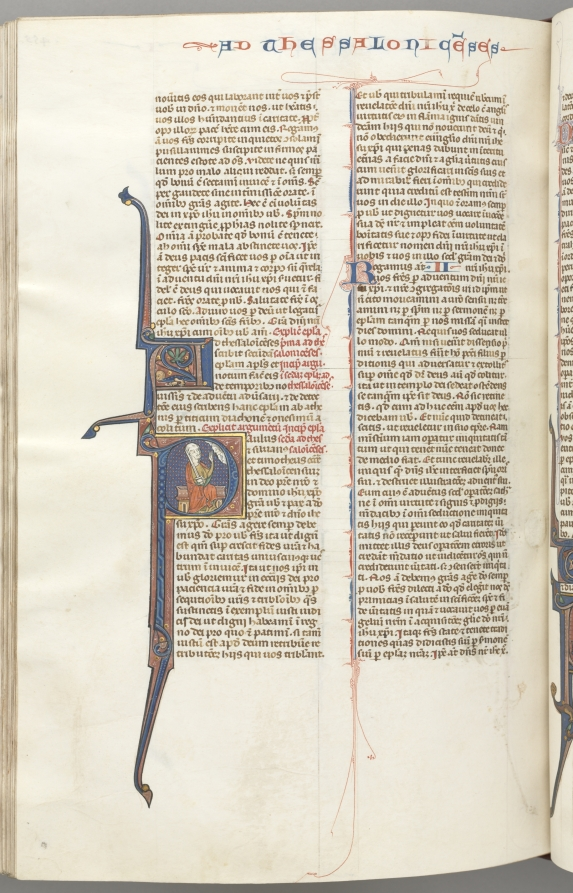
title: Fol. 455v, Thessalonians II, historiated initial P, Paul seated with a sword, talking to the bust of God above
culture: Southern France, Toulouse(?), 13th century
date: c. 1275–1300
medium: ink, tempera and gold on vellum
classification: Bound Volume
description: Biblical manuscripts were highly prized and important possessions of churches, monasteries, cathedral schools, and universities throughout medieval Europe. The biblical texts were known as the vulgate, the translations made by Saint Jerome in the fourth century from Hebrew and Greek into Latin, which became the definitive and official Latin version of the Roman Church. In the 13th century, the bible was, for the first time, produced as a single volume with an officially sanctioned sequence to its books and chapters as illustrated by this example. The very extensive decoration of this bible is arranged hierarchically to indicate the relative importance of the various texts so that full or almost full-page initials mark the openings of the first prologue, Genesis, and the first Gospel; historiated initials mark the beginning of each book and illuminated initials mark the Prologues.